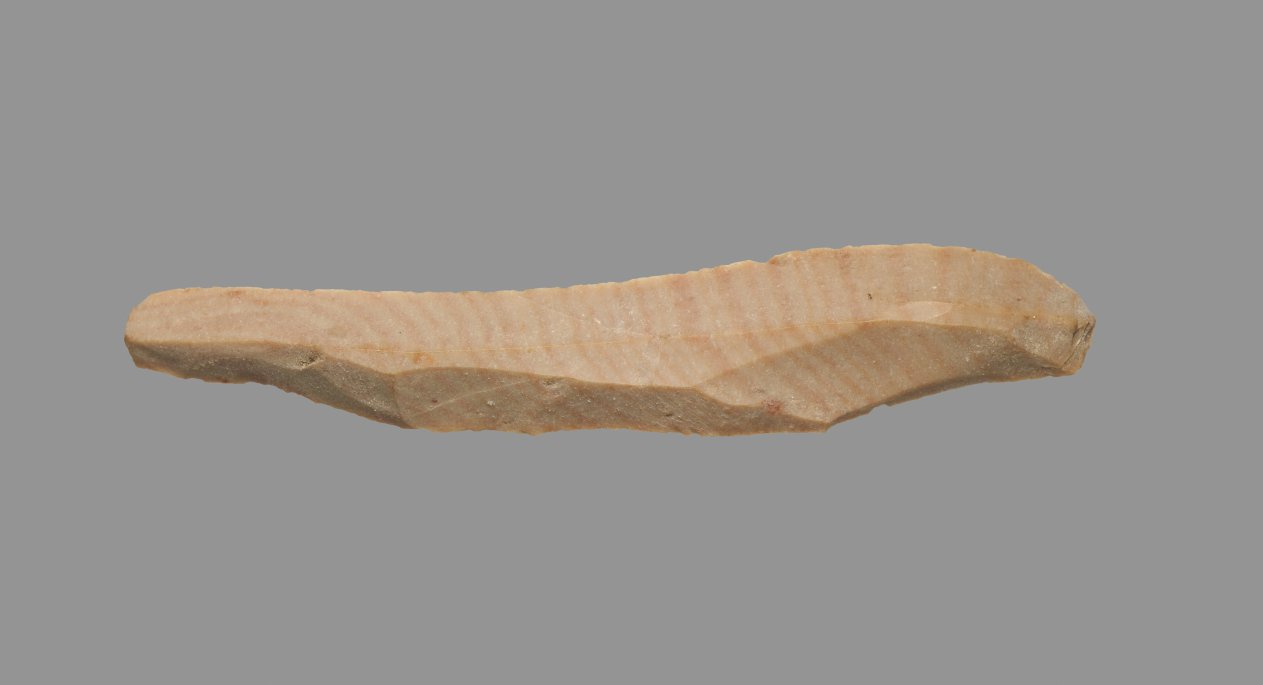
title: Sickle Blade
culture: Egypt, Middle Kingdom (2040–1648 BCE), Dynasty 12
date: 1980–1801 BCE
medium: flint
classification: Implements